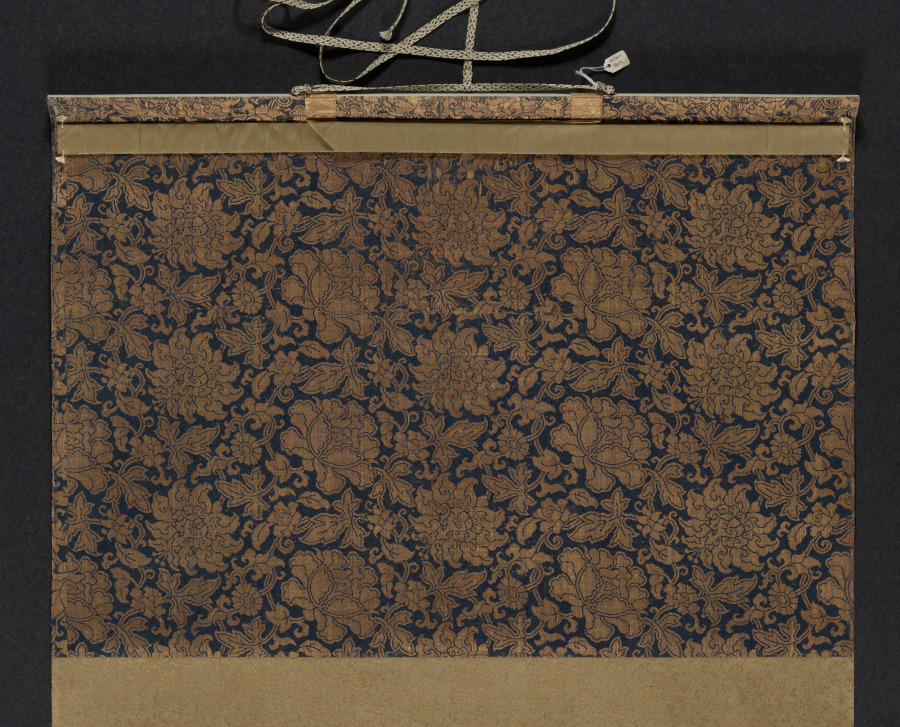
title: Dragon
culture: China, Southern Song dynasty (1127-1279)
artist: Fachang Muqi (Chinese, 1220–1280)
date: c. 1250–79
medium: Hanging scroll; ink on silk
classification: Painting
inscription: 道有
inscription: 雜華室印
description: The dragon and tiger are tied to the philosophical concept of yin and yang, which describes opposite but complementary forces. The dragon occupies a tiered background of waves and mist. Its luminous head emerges from the darker passages, and its narrow twisting body is serpent-like. By contrast, the close-up view of the tiger emphasizes its bulk. The tiger bends its head to lick its paw while its tail curls in the foreground. In their original Chan Buddhist context, this pair of scrolls likely flanked a central image, like the Bodhisattva Guanyin. The silk has darkened over the centuries, and the slight reddish shading in the tiger’s tongue and nose has faded.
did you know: Fachang Muqi was a Chinese Chan Buddhist monk and painter.